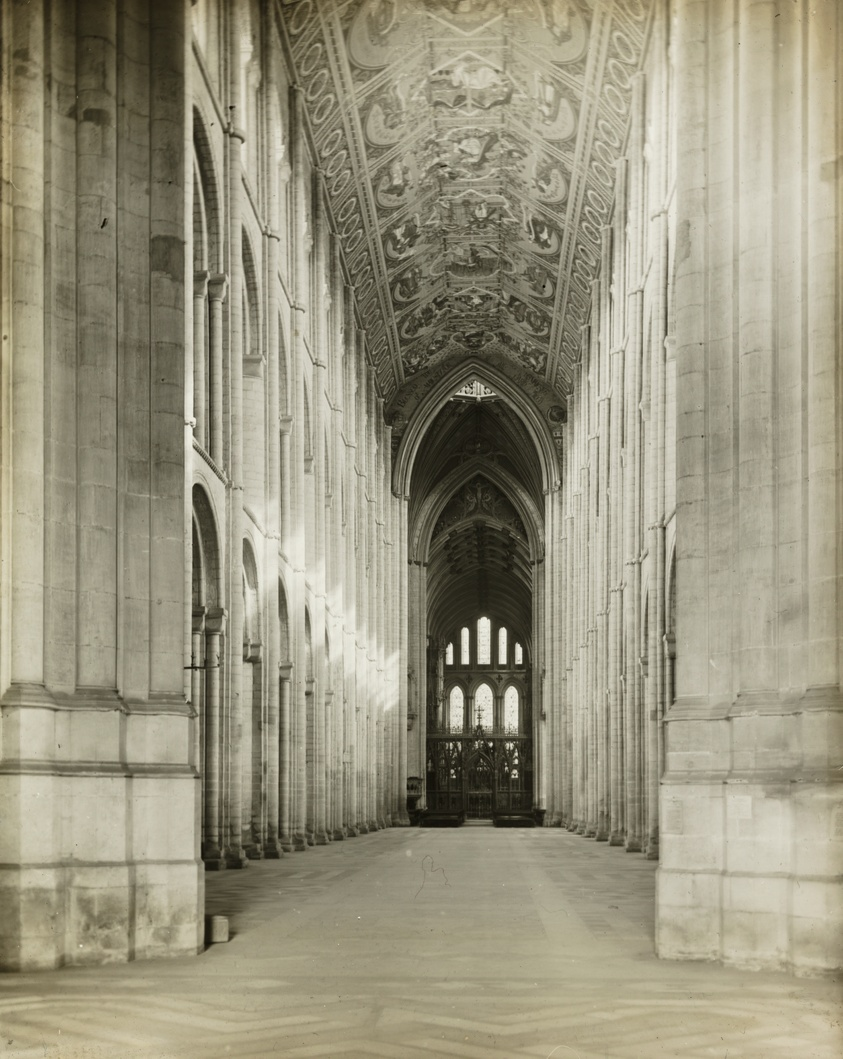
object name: Photograph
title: Ely Cathedral: Nave from Porch Door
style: Pictorialism, 19th century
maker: Frederick H. Evans (English, 1853–1943)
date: 1891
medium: Lantern slide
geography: England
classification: photograph; photography